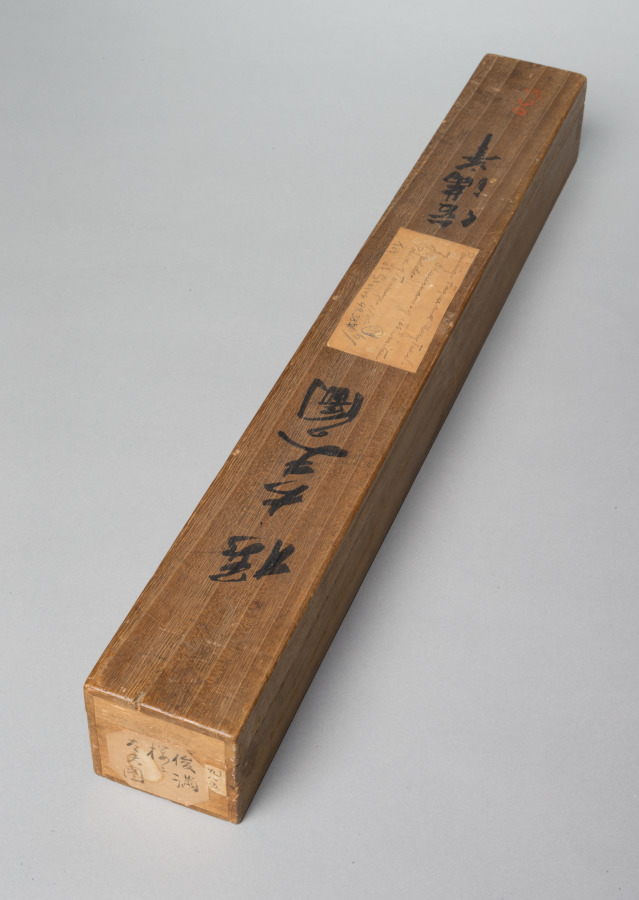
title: Woman and Two Children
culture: Japan, Meiji period (1868–1912)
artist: copy after Kubo Shunman (Japanese, 1757–1820)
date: early 1900s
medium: hanging scroll; color and gold on silk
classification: Painting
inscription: signed Kubo Shunman